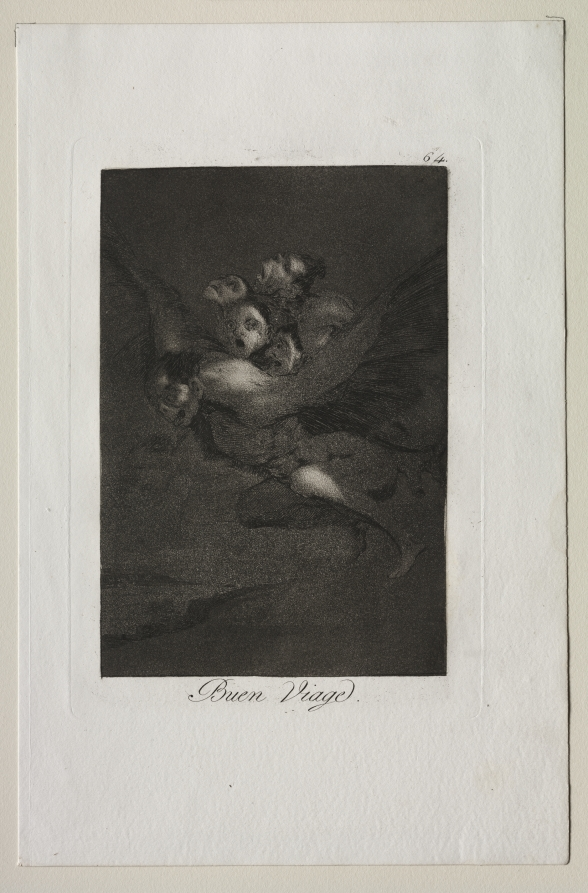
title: Bon Voyage, Plate 64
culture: Spain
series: Los Caprichos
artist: Francisco de Goya (Spanish, 1746–1828)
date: 1799 (printed c. 1855)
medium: etching and aquatint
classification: Print